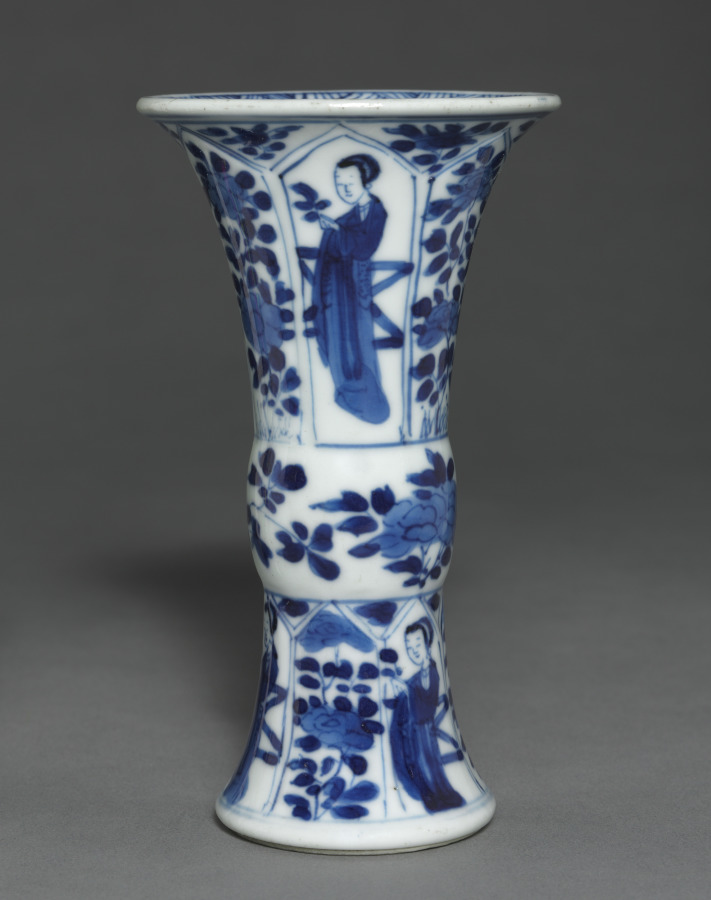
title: Beaker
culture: China, Qing dynasty (1644-1911), Daoguang reign (1821-1850) - Xianfeng reign (1851-1861)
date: 19th Century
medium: porcelain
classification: Ceramic